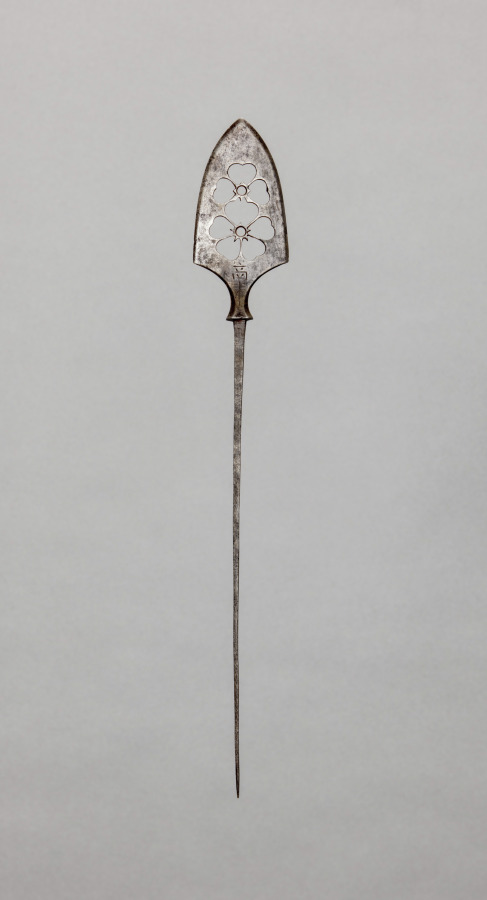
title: Arrow Point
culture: Japan, Edo period (1615–1868)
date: 1700s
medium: steel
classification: Arms and Armor